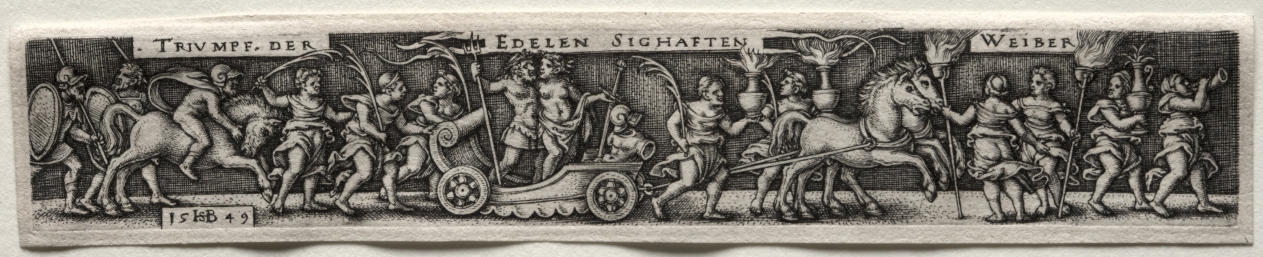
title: Triumph of the Women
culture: Germany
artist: Hans Sebald Beham (German, 1500–1550)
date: 1549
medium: engraving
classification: Print